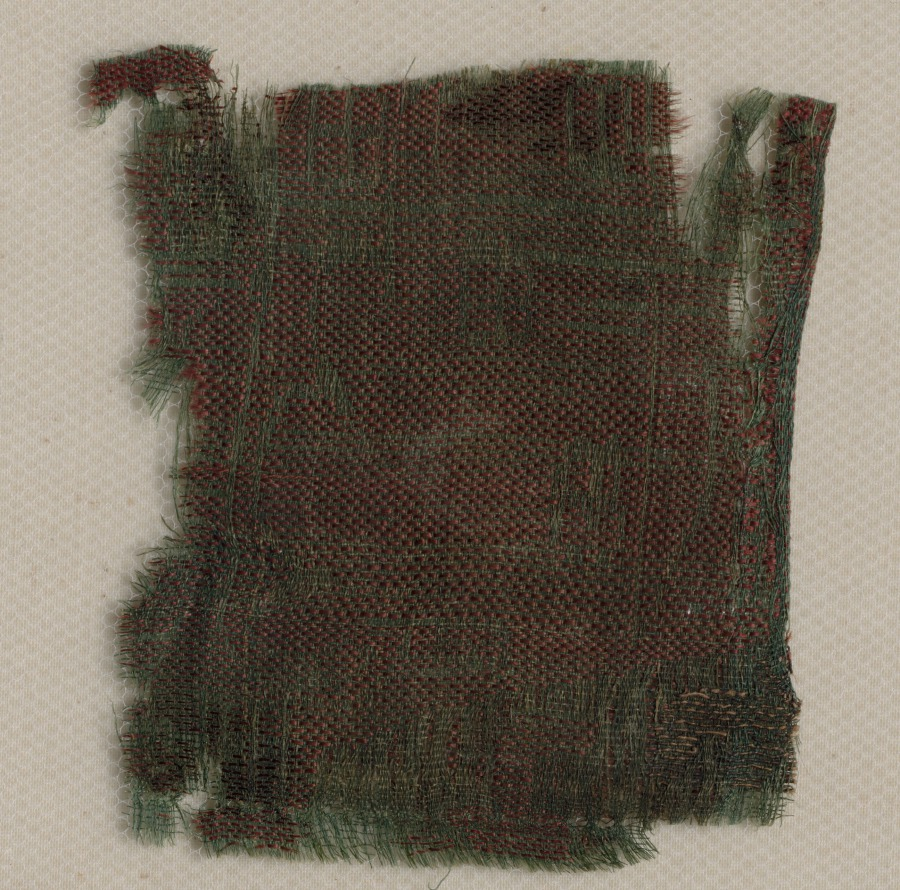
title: Three Fragments of Italian Gothic Silk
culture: Italy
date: 1300s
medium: silk and gold thread: lampas weave, brocaded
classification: Textile